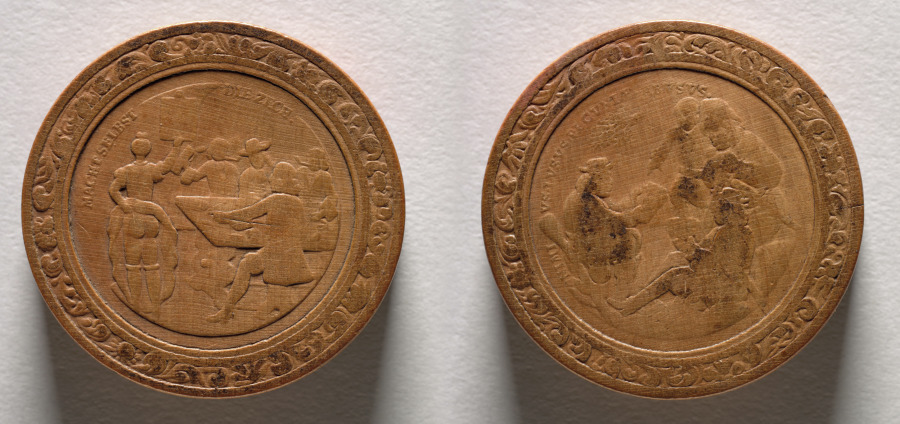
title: Gaming Piece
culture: Germany, late 17th-early 18th Century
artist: Martin Brunner (German, 1659–1725)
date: c.1700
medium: wood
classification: Furniture and woodwork